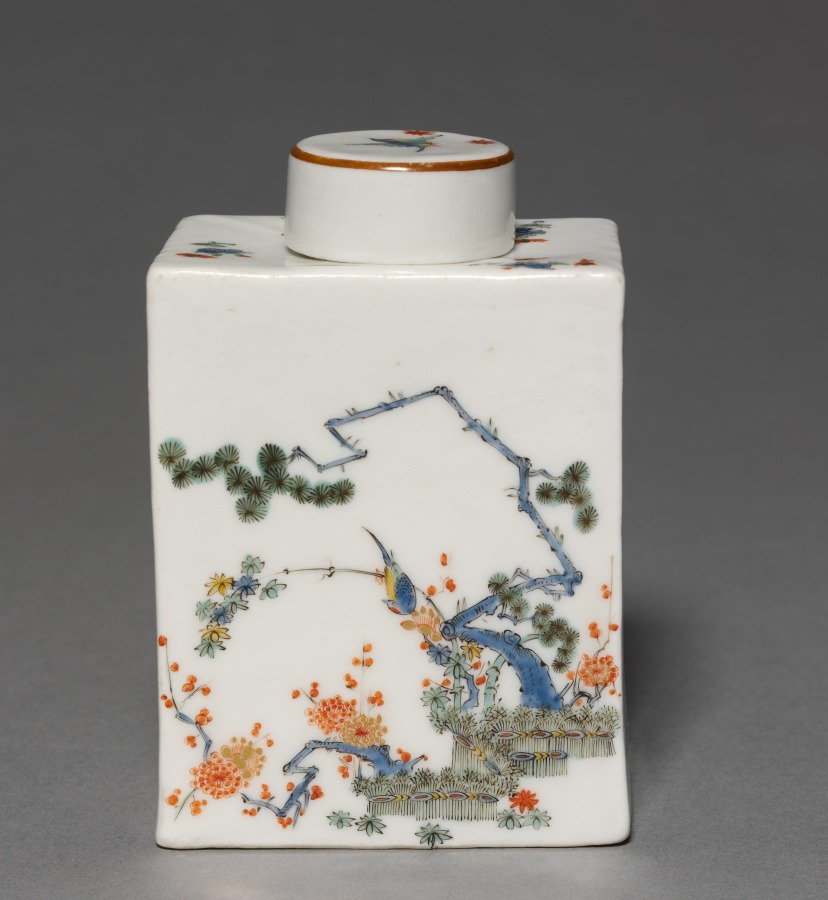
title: Tea Caddy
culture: Germany, Meissen, 18th century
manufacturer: Meissen Porcelain Factory (German, est. c. 1710)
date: c. 1735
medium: porcelain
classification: Ceramic